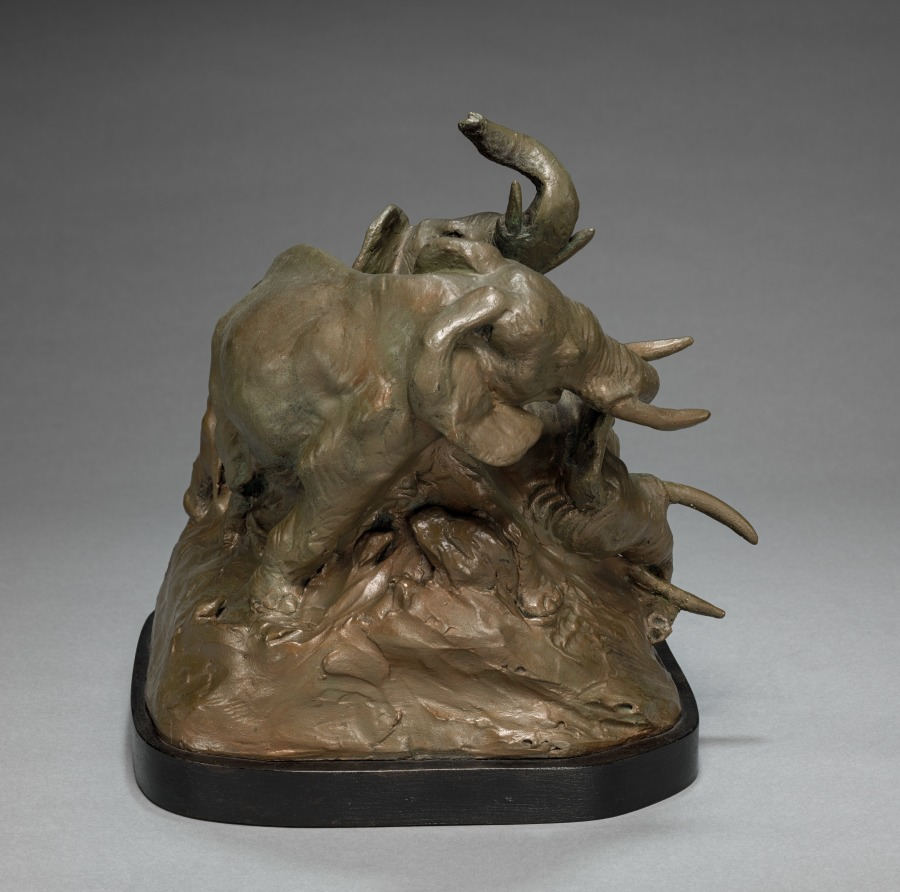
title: Mired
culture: America, Ohio, Cleveland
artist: John Ross Stewart (American, 1872–1954)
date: 1920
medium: plaster painted to resemble patinated green bronze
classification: Sculpture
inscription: incised in plaster near base: "Mired" and "JRS."